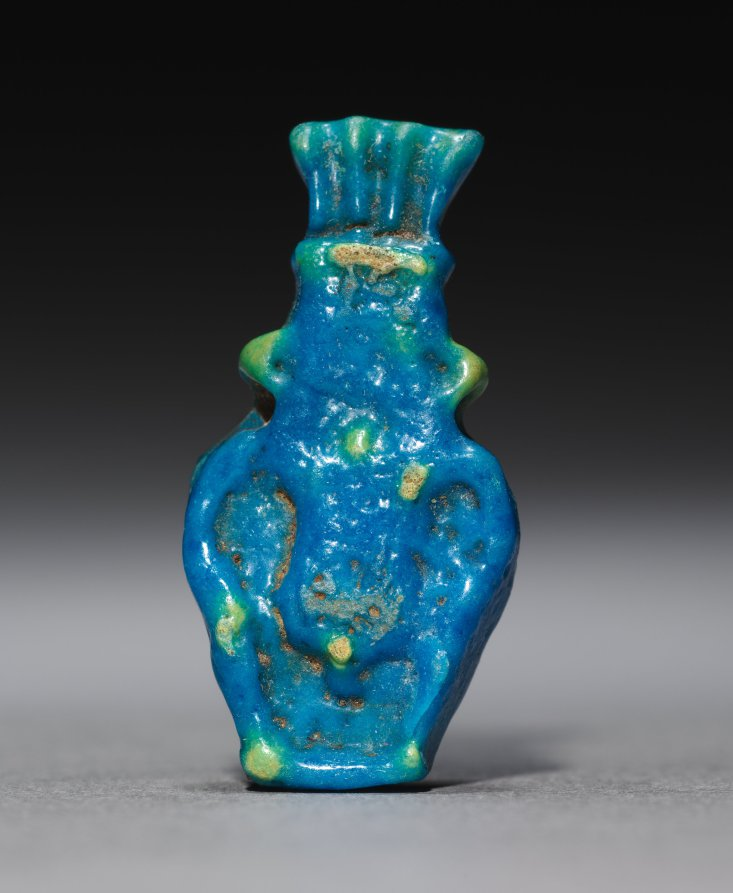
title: Amulet of Bes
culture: Egypt, Greco-Roman period (332 BCE–395 CE), Roman empire (30 BCE–395 CE)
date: 30 BCE–395 CE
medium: polychrome faience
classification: Amulets